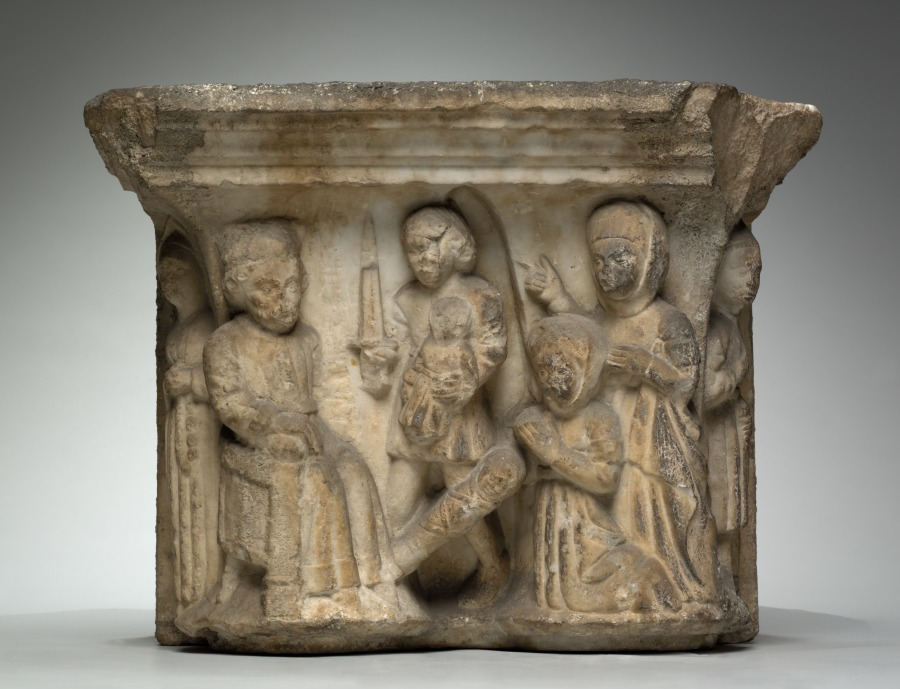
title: Engaged Capital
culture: Southern France, Abbey of Larreule, near Tarbes, 15th century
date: 1400s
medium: limestone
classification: Sculpture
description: This capital belongs to a surviving group including other architectural fragments that once decorated the cloister of the Abbey of Larreule. A cloister was a covered walkway or arcade, usually around all four sides of a square area of grass (the "cloister garth"). The seclusion of the cloister was the monks’ exclusive domain, off limits to others. Here, the monks were supposed to pray, study, meditate, and exercise in privacy and solitude. Such cloister capitals served both to instruct the monks and as a focus for their devotions. Other capitals in this series are installed in the Jardin Massey at Tarbes, near the original abbey. An arch from Larreule has been assembled with other associated French capitals at The Cloisters in New York.